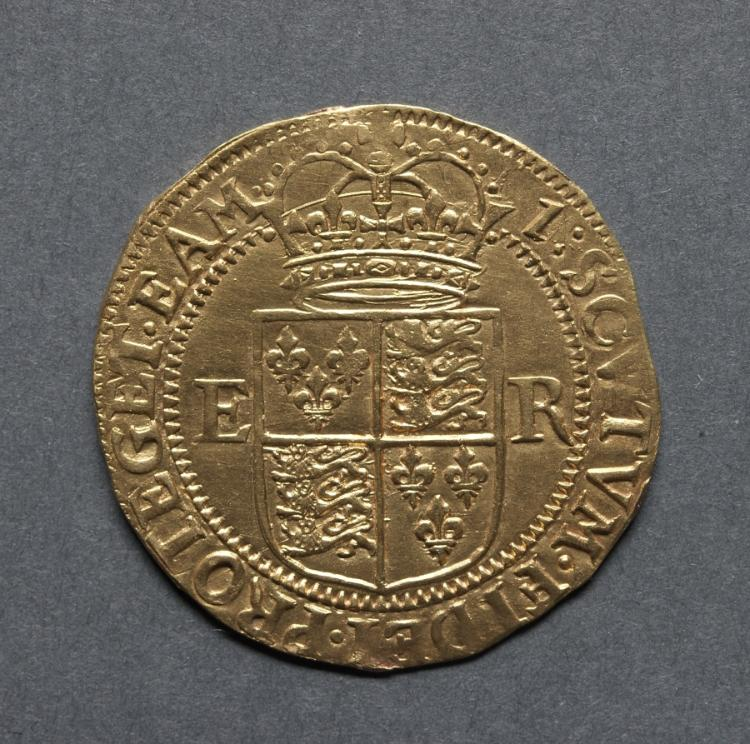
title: Half Pound: Crowned Shield of Arms (reverse)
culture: England, Elizabeth I, 1558-1603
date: 1601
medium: gold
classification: Coins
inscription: SCVTVM: FIDEI: PROTEGET: EAM.